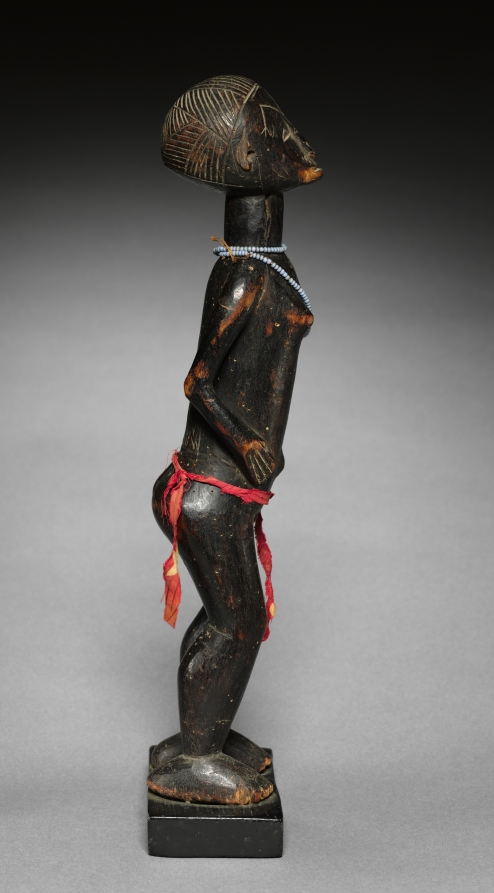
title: Female Figure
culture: Democratic Republic of the Congo, Tabwa, late 19th or early 20th century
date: 1900s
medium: Wood, cloth, glass beads, and natural fiber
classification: Sculpture